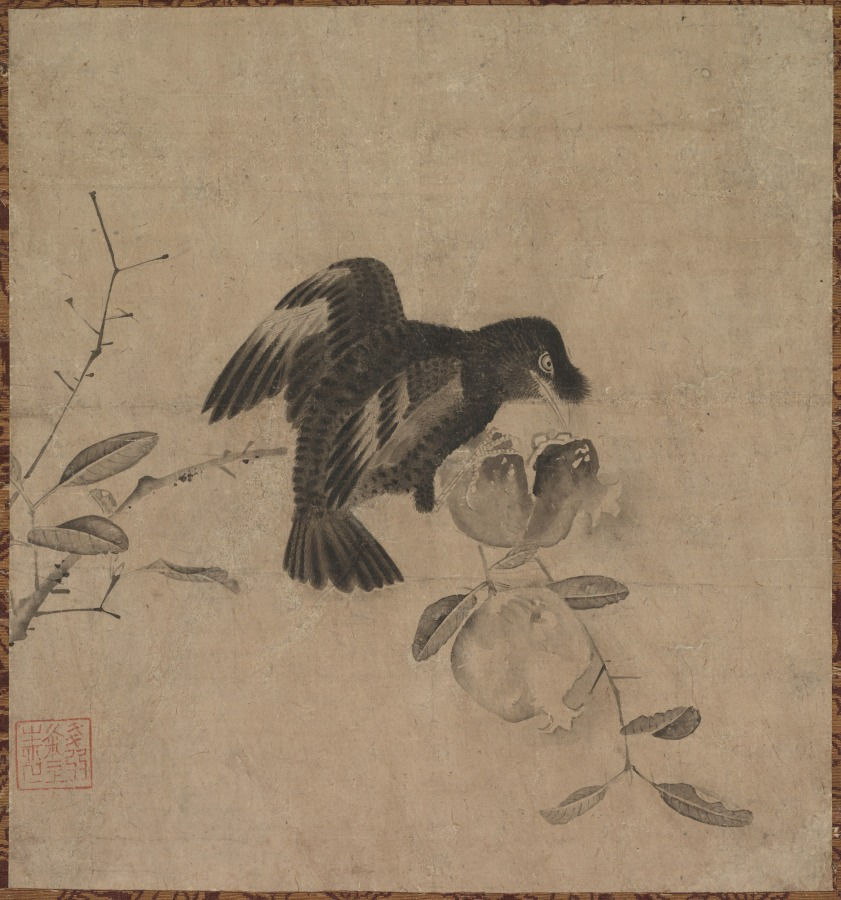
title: Crow on a Pomegranate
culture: Japan, Muromachi period (1392–1573)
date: 1500s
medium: hanging scroll; ink on paper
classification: Painting